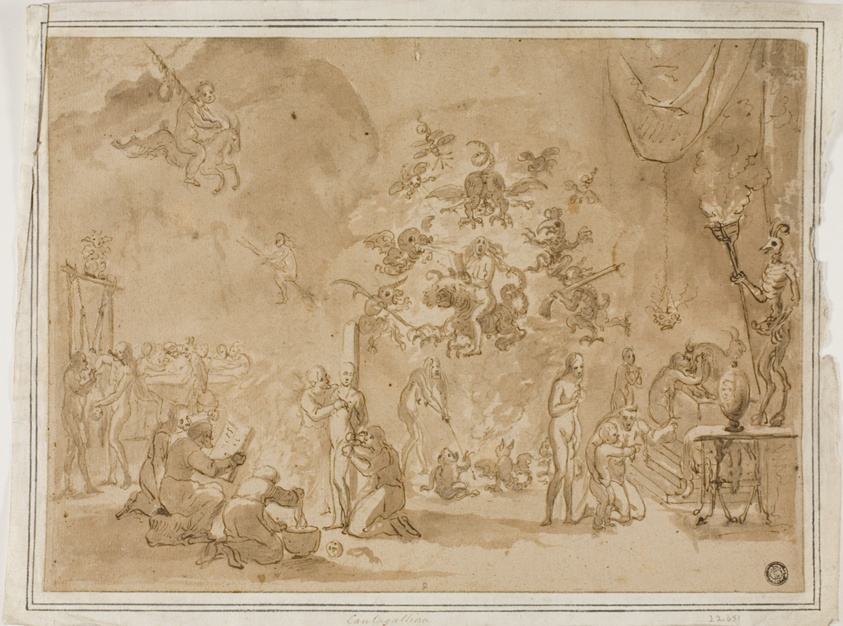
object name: Drawing and Watercolor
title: Scene of Witchcraft and Devil Worship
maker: Attributed to David Teniers the Younger (Flemish, 1610-1690); or Remigio Cantagalina (Italian, 1582-1656)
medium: Pen and brown ink with brush and brown wash, over traces of black chalk, on brown laid paper, laid down on ivory laid paper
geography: Flanders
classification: pen and ink drawings; drawings (visual works); prints and drawing